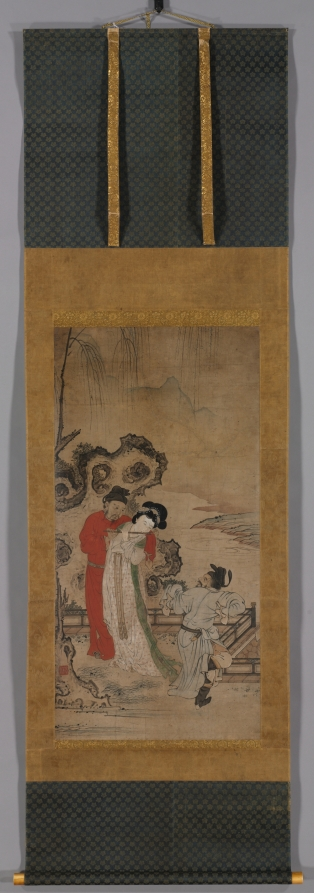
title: Emperor Minghuang Teaching Yang Gueifei to Play the Flute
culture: Japan, Muromachi period (1392–1573)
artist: Choryusai (Japanese)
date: late 1400s–early 1500s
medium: hanging scroll; ink and color on paper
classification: Painting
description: Minghuang, a prominent emperor of Tang (618-906) China and his consort, Yang Gueifei, have inspired many legends, paintings, and poetry in later Chinese culture. Through the study of Chinese literature and the collecting of Chinese paintings, tales of their lives and romance became well-known in Muromachi Japan.